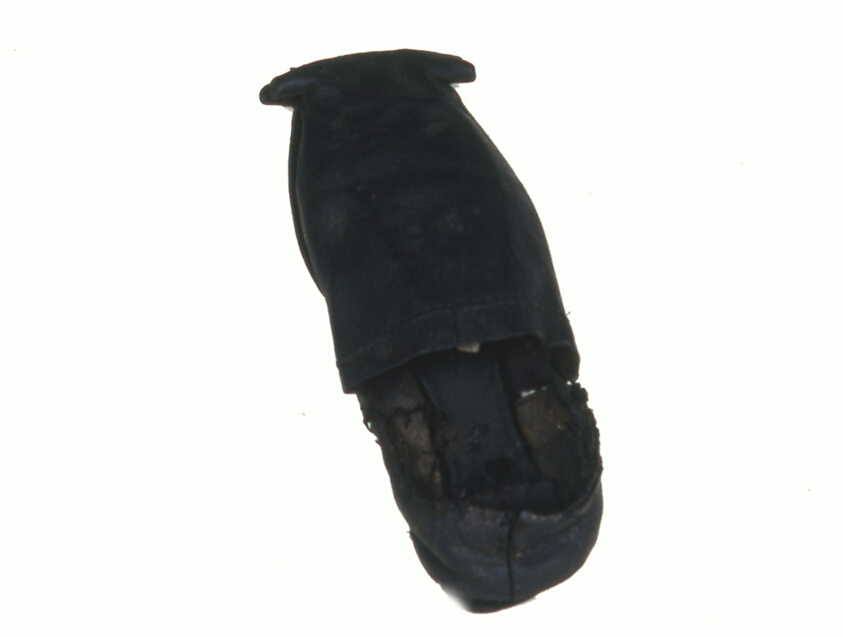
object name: Textile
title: Shoe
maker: England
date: 17th century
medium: Leather with metal buckles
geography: England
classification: textile; shoes - misc; costume accessory - shoe